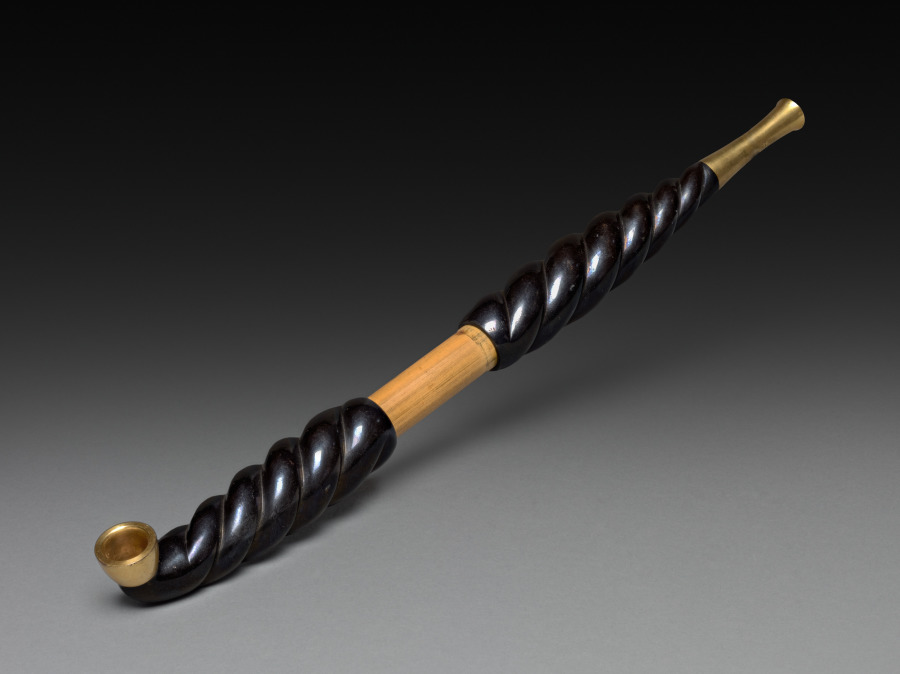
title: Tobacco Pipe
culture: Japan, Edo period (1615–1868)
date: early to mid-1800s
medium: bamboo, brass, and iron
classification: Miscellaneous